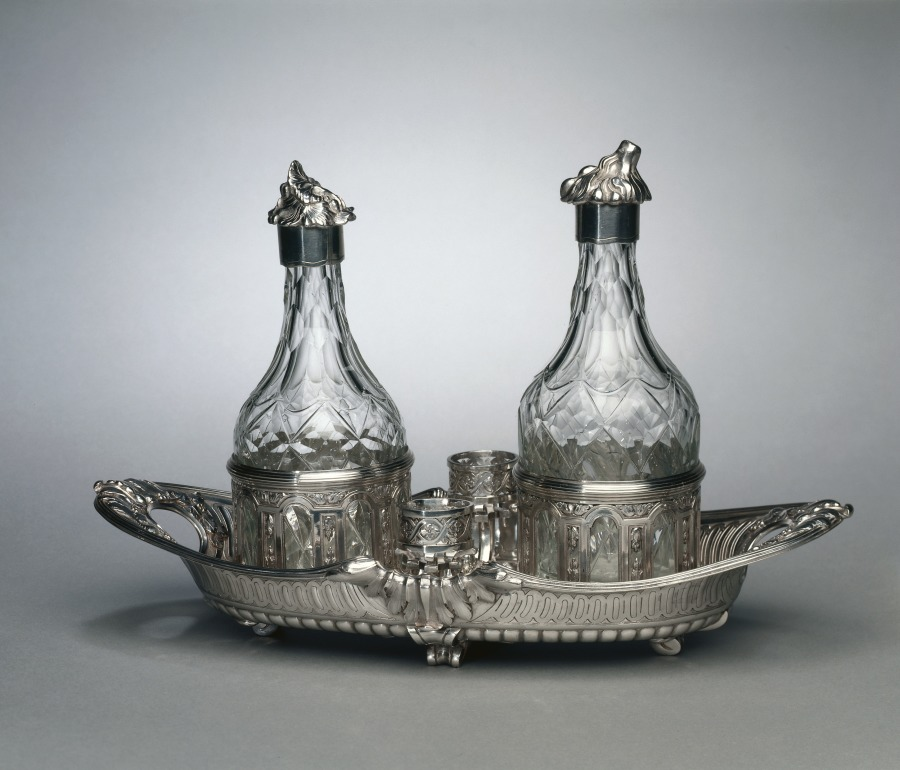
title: Cruet Stand (Huilier)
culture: France, 18th century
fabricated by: Robert Joseph Auguste (French, 1723–after 1795)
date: 1766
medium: silver and glass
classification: Silver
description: These bottles would have held oil and vinegar. Their silver stoppers, decorated with grapes and the leaves of vines, hint at their function. Master goldsmith Robert-Joseph Auguste was known for his silverwork in the neoclassical style. This style is present on the supports for these bottles whose stylized columns and scrollwork pull inspiration from the art of classical antiquity.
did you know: In 1778, Robert-Joseph Auguste received the title orfèvre ordinaire du roi, becoming the principal goldsmith for the royal court of King Louis XVI.